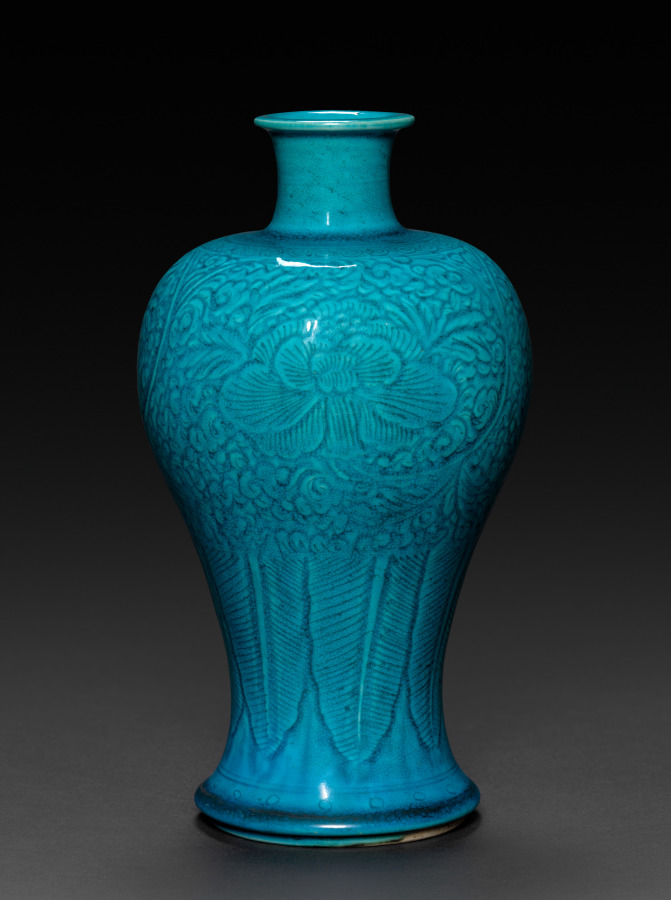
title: Vase with peacock blue glaze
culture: China, Qing dynasty (1644-1911), Kangxi reign (1661-1722)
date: 1662–1722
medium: porcelain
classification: Ceramic